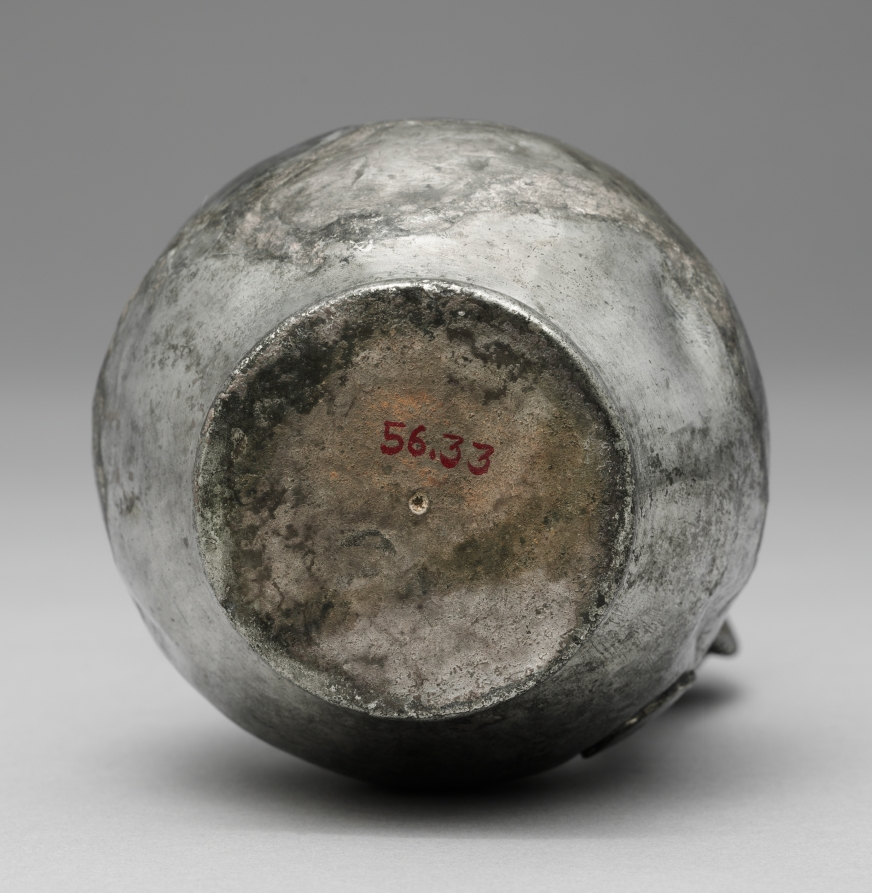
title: Ewer with a Trefoil (Three-Part) Spout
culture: Byzantium, Syria(?), Byzantine period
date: 300–600 CE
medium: silver with niello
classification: Metalwork